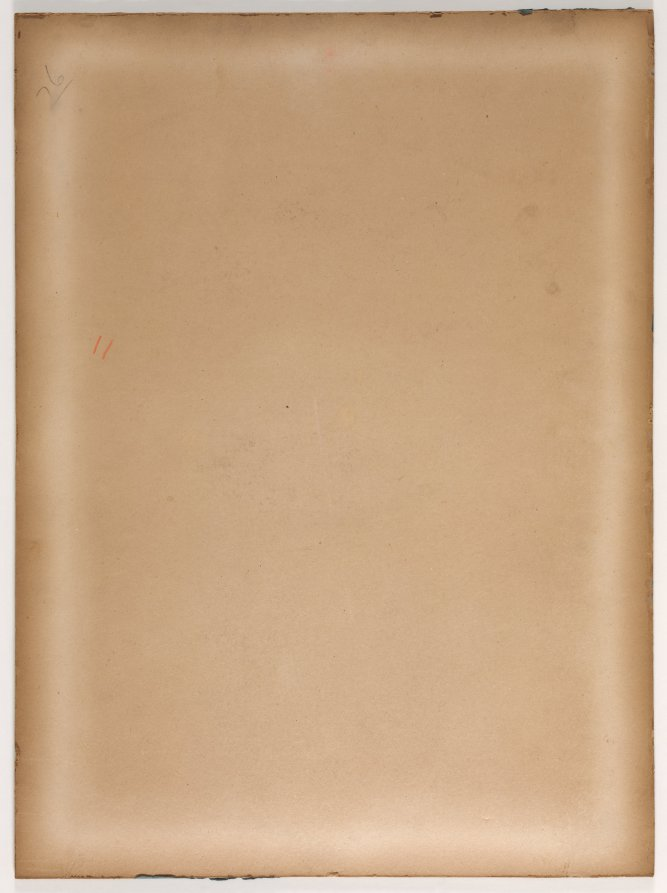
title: Leaf from a Psalter with Historiated Initial (B): King David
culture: Italy, Florence, 15th century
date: c. 1450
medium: ink, tempera, and gold on parchment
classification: Manuscript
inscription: Beatus vir qui non abit..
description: Books of hours evolved from psalters, books that contained the Old Testament book of Psalms (sacred songs) for use in churches. Psalters also included calendars, prayers for the dead, and a specific group of prayers known as the Hours of the Virgin. By the 1200s, laypeople were requesting psalters without the cumbersome psalms, and thus the book of hours was born. This leaf contains Psalm 1, which begins with a large, decorated B containing an image of King David kneeling with a plucking instrument on the ground. The text says beatus vir qui non abit, or “blessed is the man.”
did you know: The larger size of this leaf indicates it could be used by a group of readers.